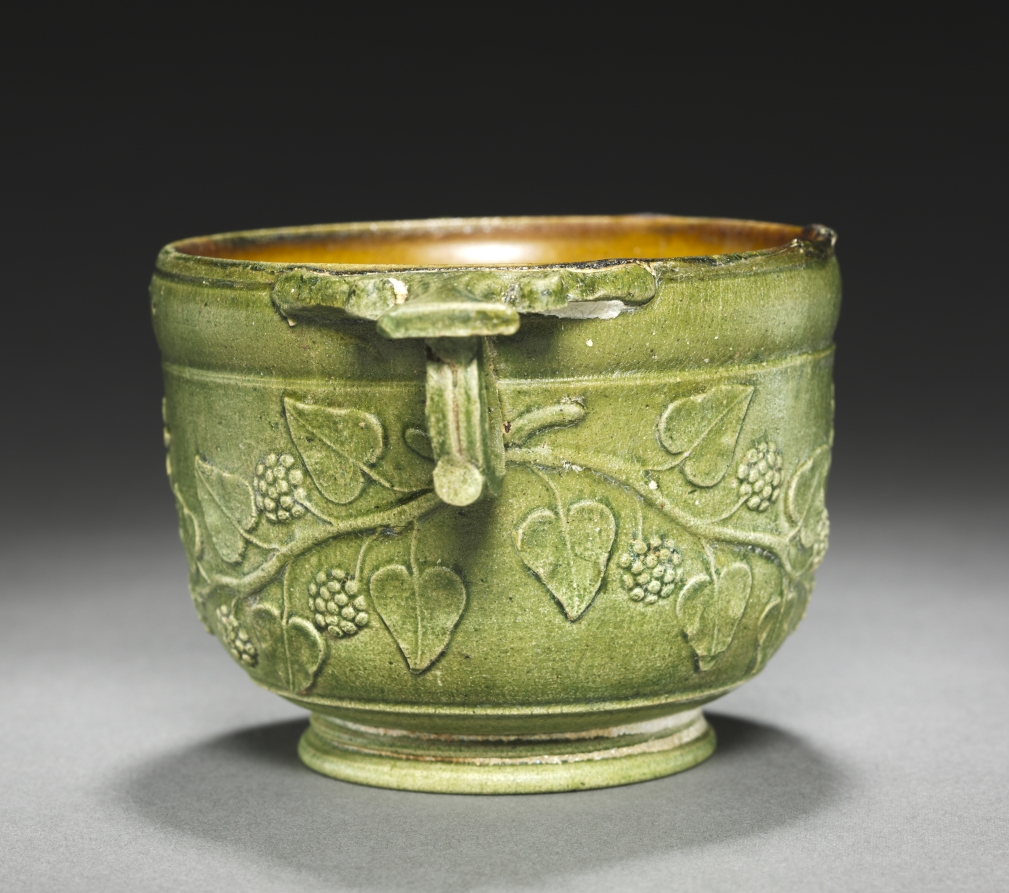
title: Skyphos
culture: probably Turkey, Roman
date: 1–100 CE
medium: earthenware with slip decoration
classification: Ceramic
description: Lead glaze was first used near the Mediterranean basin around 1000 bc, appearing in Mesopotamia and Egypt almost simultaneously. The technique flourished during the Roman Empire, and examples can be found in all reaches of the realm from England and Germany to North Africa, Syria, and Turkey, and perhaps even further east. This is a very fine example of this technique.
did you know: Lead glaze is what gives this wine cup its yellowish-green color.